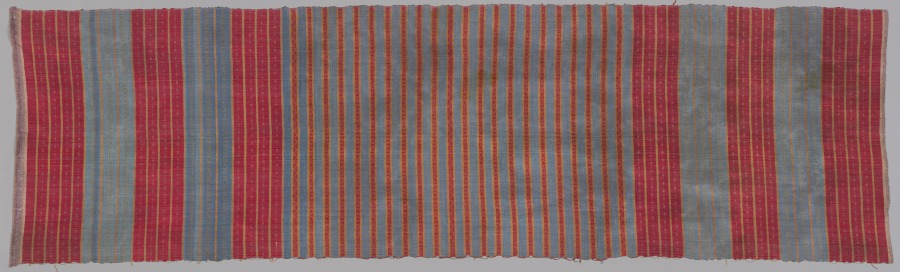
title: Blanket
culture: India, 19th century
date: 1800s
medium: Twill weave: cotton?, metal thread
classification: Textile